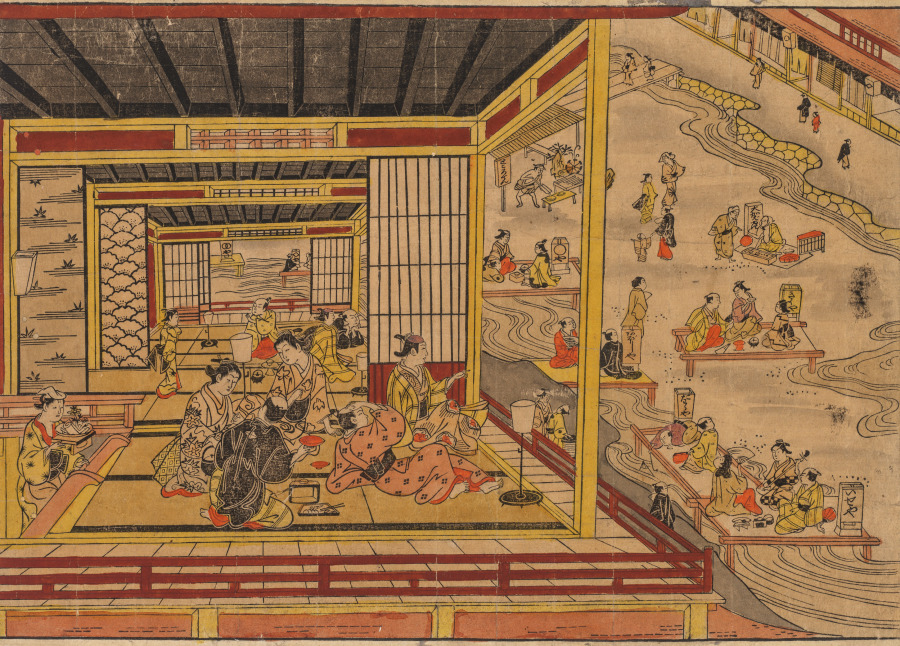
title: Tea House Beside the Kamo River in Kyoto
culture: Japan, Edo period (1615–1868)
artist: Nishimura Shigenaga (Japanese, 1697(?)-1756)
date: 1740s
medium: color woodblock print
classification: Print